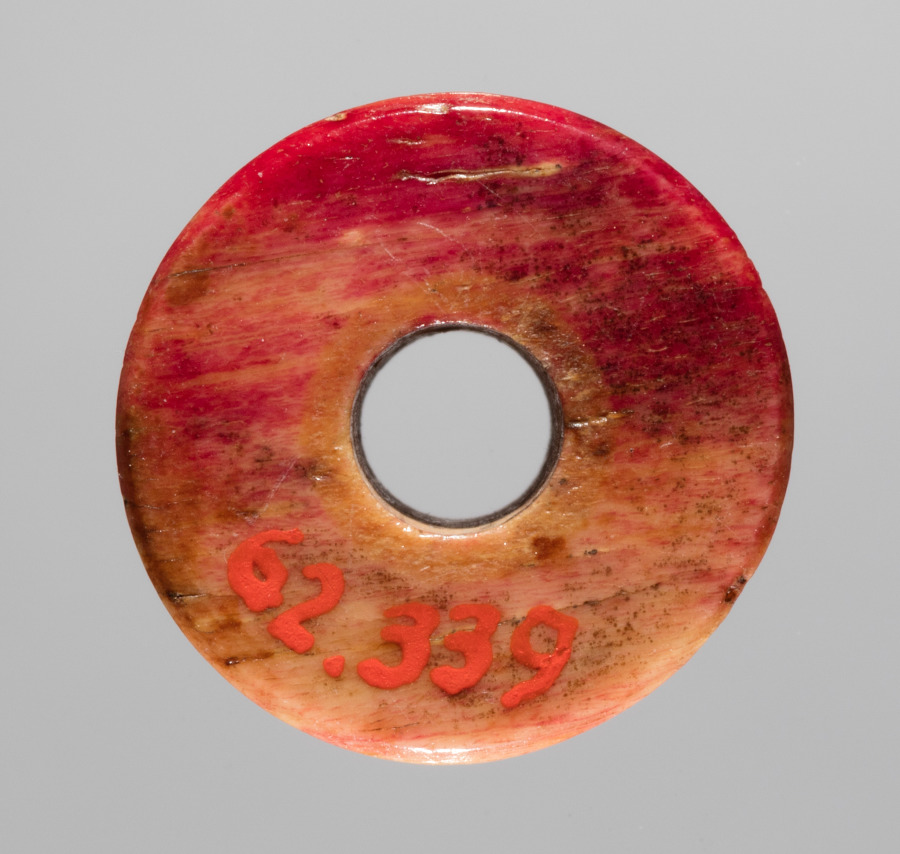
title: Spindle Whorl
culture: Iran, early Islamic period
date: 700s - 900s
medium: bone, incised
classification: Spindle Whorl